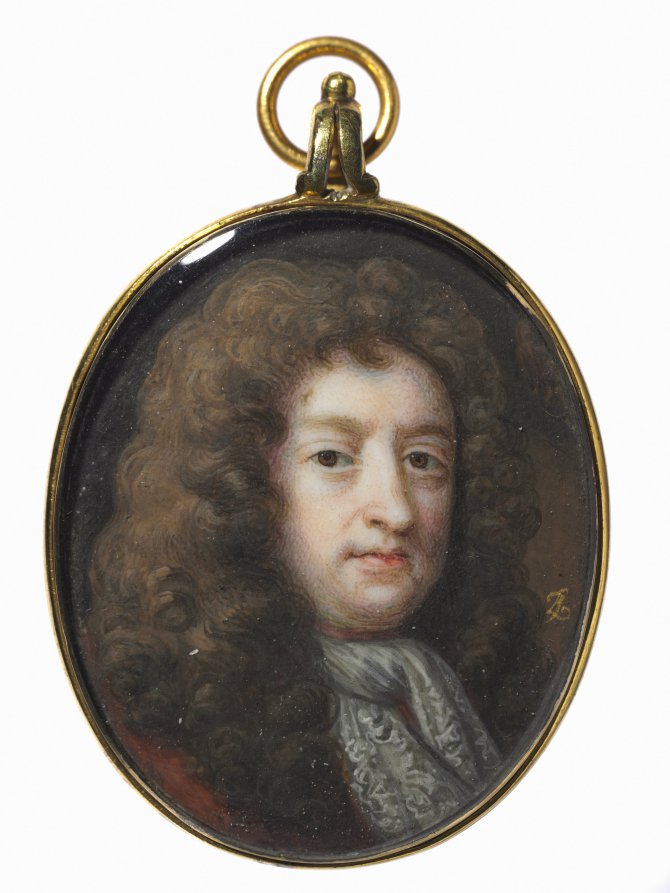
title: Portrait of Samuel Butler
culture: England, early 18th century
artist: Bernard Lens (British, 1681–1740)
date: c. 1715–20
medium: watercolor on ivory in a period metal frame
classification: Portrait Miniature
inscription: signed right: BL [in monogram]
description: Bernard Lens III was the most renowned member of an artist dynasty. His namesake father was a printmaker, his grandfather a painter, and two of his own sons became artists. Lens III was a critical figure in miniature painting as the art form transitioned away from painting on vellum. During the first decade of the eighteenth century, he established ivory as the primary miniature support in Britain, probably having seen the pioneering work of Rosalba Carriera (1675–1757) brought to England from Venice during the flowering of the Grand Tour. The earliest known miniatures by Lens were painted on vellum around 1707, with examples on ivory appearing shortly thereafter. Lens spent his career in London, Bristol, and Bath while also traveling to the country estates of his influential patrons. He was painter to kings George I and George II, as well as drawing instructor to princesses Mary and Louise, the Duke of Cumberland, and Horace Walpole (1717–1797). The sitter, Samuel Butler, turns slightly to the left and has brown eyes. A small portion of his dull red coat is visible, and he wears a white lace cravat twisted around his neck in a loose knot—an essential element of a gentleman’s dress that was fashionable between the 1670s and 1690s and unlike the broad lace or linen collars that dominated in the early and mid-seventeenth century. A long, brown, curled wig falls past his shoulders, and one comma-shaped curl is arranged at the center of his forehead. Butler’s voluminous wig occupies half of the painted surface. During the 1660s gentlemen regularly wore wigs, and while they offered a practical solution to such predicaments as hair loss, graying, and lice, wigs were subject to the vicissitudes of fashion. The wig style seen here is that of the late seventeenth century. Around 1680 it became the norm to part the long wig at the center, which by 1700 resulted in two pronounced tufts on either side, a style not yet exhibited in this portrait. Butler was a poet and satirist popular at the court of King Charles II (reigned 1660–1685). He is primarily remembered as the author of Hudibras, a mock-heroic epic poem satirizing Puritanism written during the English civil war and published between 1663 and 1678.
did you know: Lens often signed his work in monogram; this gold signature is well preserved on this example.